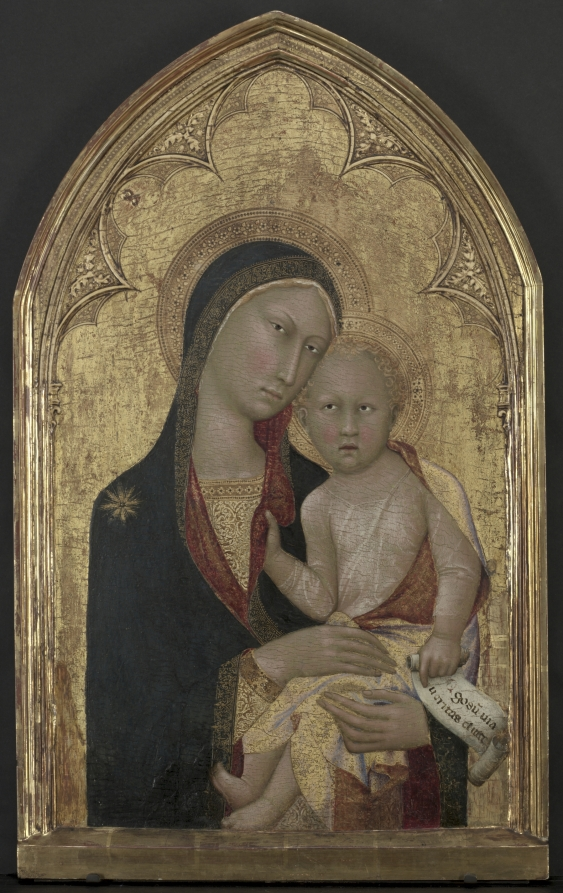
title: Madonna and Child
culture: Italy, Siena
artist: attributed to Lippo Memmi (Italian)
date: c. 1350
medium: tempera and gold on poplar panel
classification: Painting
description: On the eve of the Battle of Montaperti in 1260, the Tuscan town of Siena was dedicated to the Virgin. Siena’s miraculous victory the following day confirmed its status as the "City of the Virgin" and inspired fervent devotion among its citizens. Marian imagery flourished, and many altarpieces comprising images of the Madonna and Child flanked by saints were made for Sienese churches. This panel once formed part of such an altarpiece. Here, the infant Christ clings to his mother’s clothing. He also holds a scroll that proclaims his special destiny. Lippo Memmi was the brother-in-law of Simone Martini, an extremely influential Sienese painter. The two artists worked closely together, and this Madonna and Child reflects Simone’s aristocratic and elegant style.